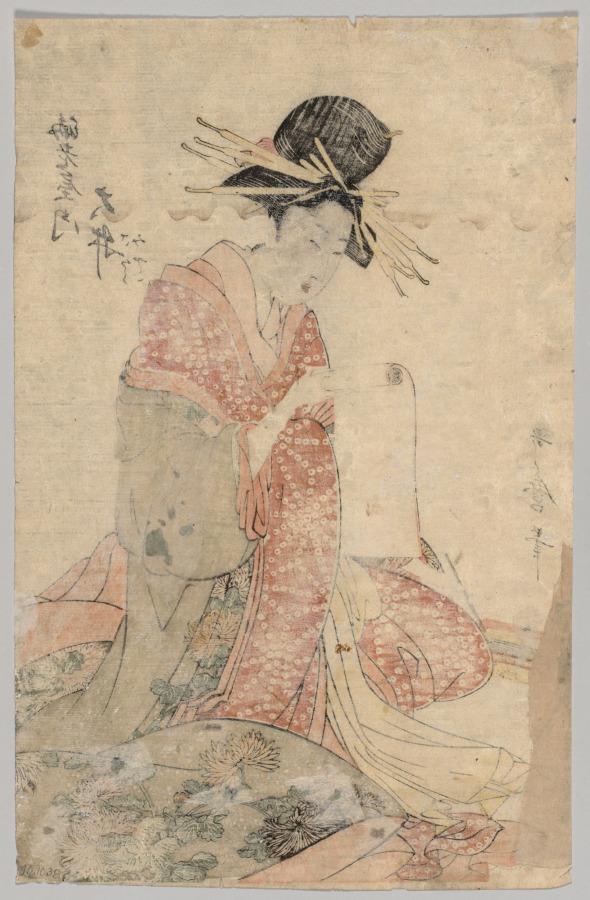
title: Woman of the Yoshiwara Reading Scroll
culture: Japan, Edo period (1615–1868)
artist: after Kitagawa Utamaro (Japanese, c. 1754–1806)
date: 1753–1806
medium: color woodblock print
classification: Print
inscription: Signature: Utamaro fude